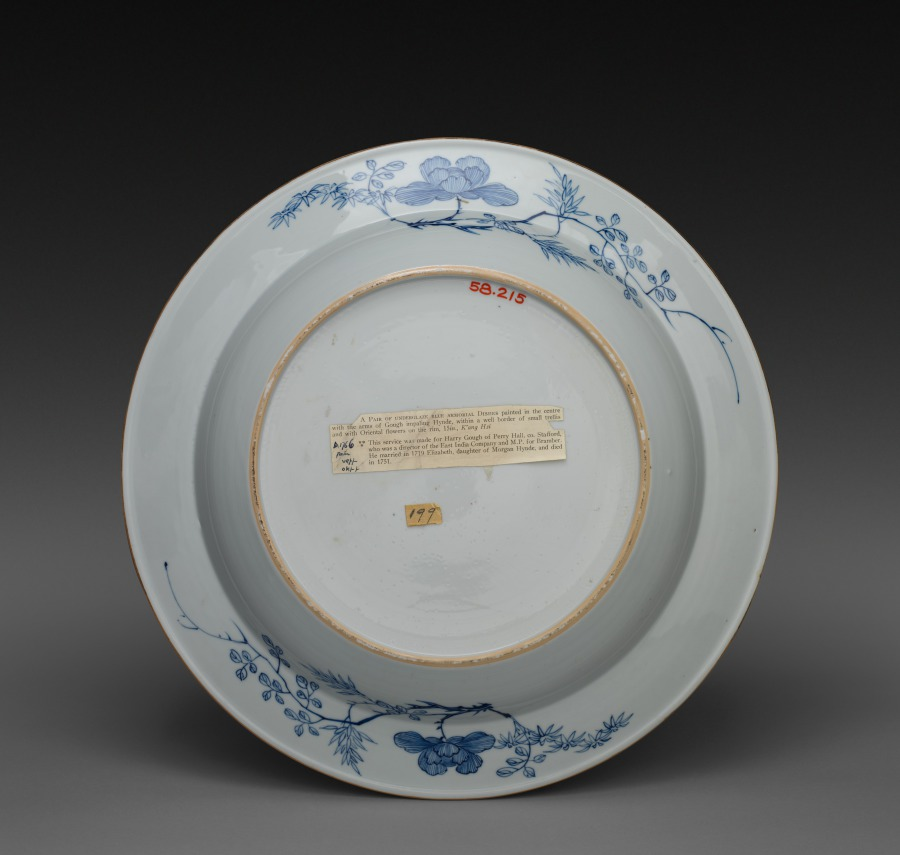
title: Charger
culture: China, Chinese Export -- English Market, 18th century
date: c. 1720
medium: porcelain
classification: Ceramic